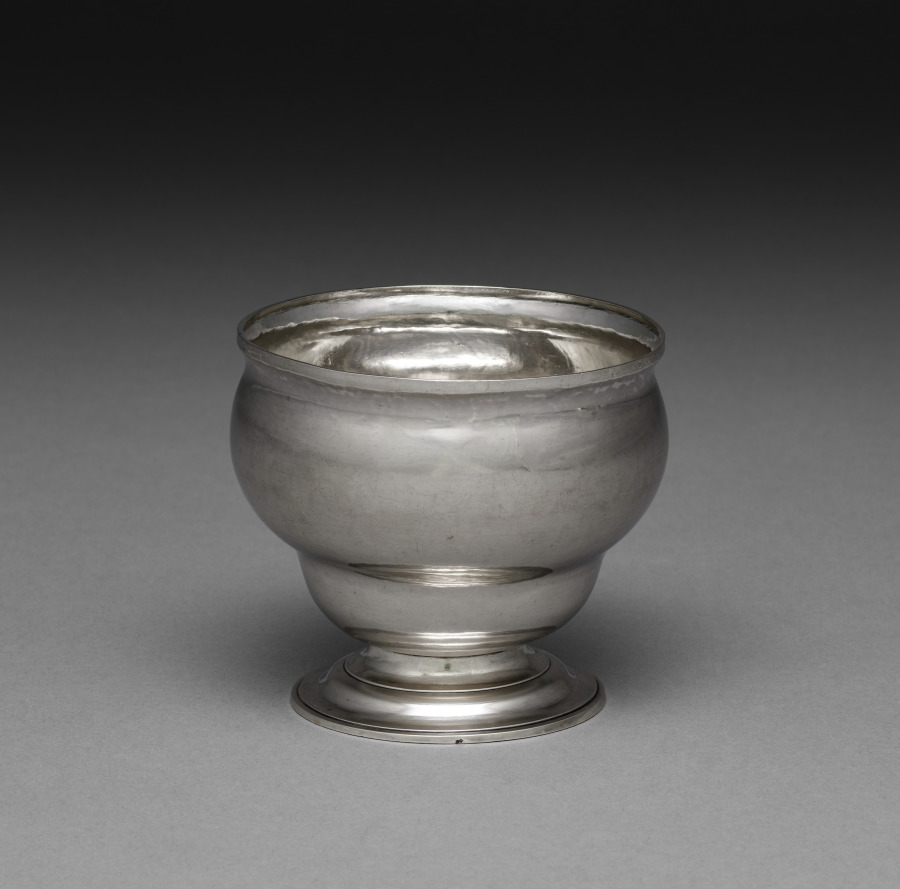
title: Sugar Bowl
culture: America, Massachusetts, 18th century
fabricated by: Thomas Lynde (American, 1748–1811)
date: c. 1770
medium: silver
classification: Silver